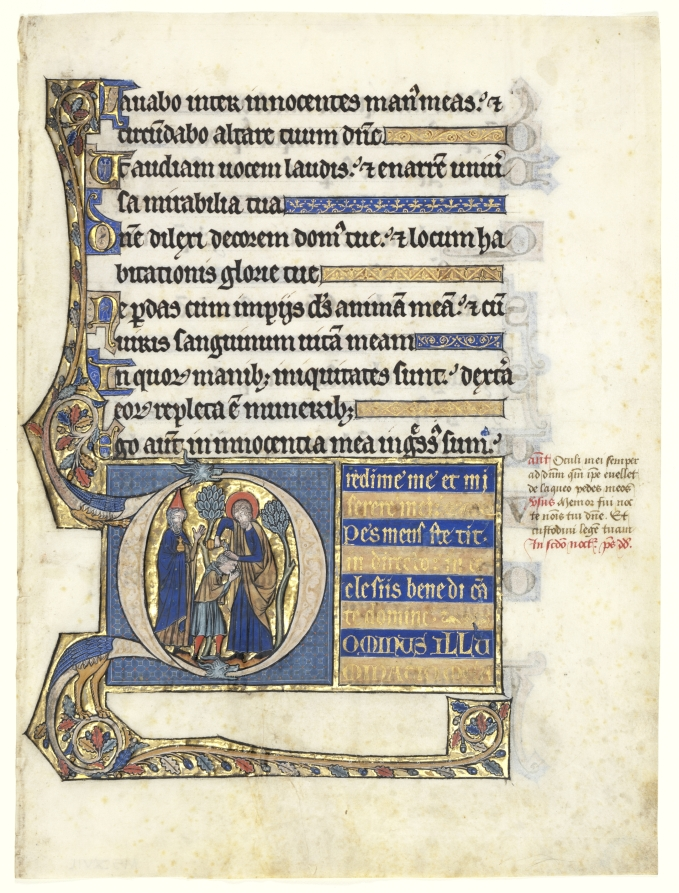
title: Single Leaf Excised from a Psalter: Initial D[ominus illuminatio mea] with Samuel Anointing David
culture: Northeastern France, 13th century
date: c. 1270–1290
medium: ink, tempera, and gold on vellum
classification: Manuscript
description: This historiated initial serves as a visual lead to Psalm 26, which begins with the last two lines of the page: Dominus illuminatio mea (The Lord is my light). By setting the body of the initial against a blue diapered (patterned) background for chromatic effect, the artist observed the latest fashion in book illumination.